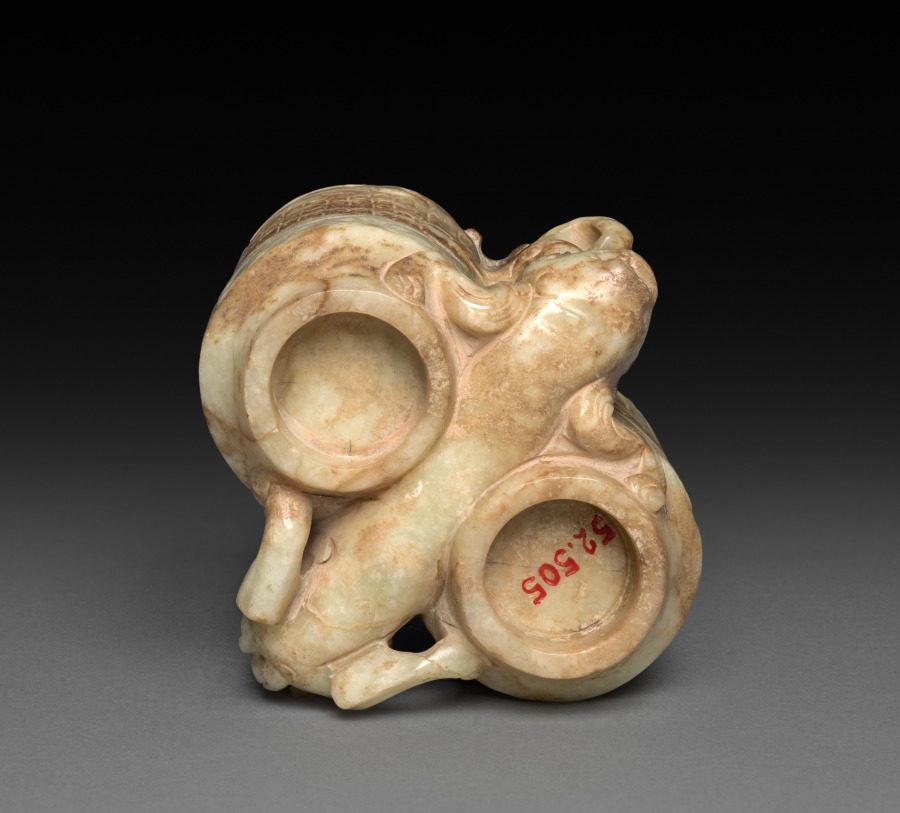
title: Champion Vase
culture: China, Song dynasty (960-1279) - Ming dynasty (1368-1644)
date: 960– 1279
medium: jade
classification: Jade